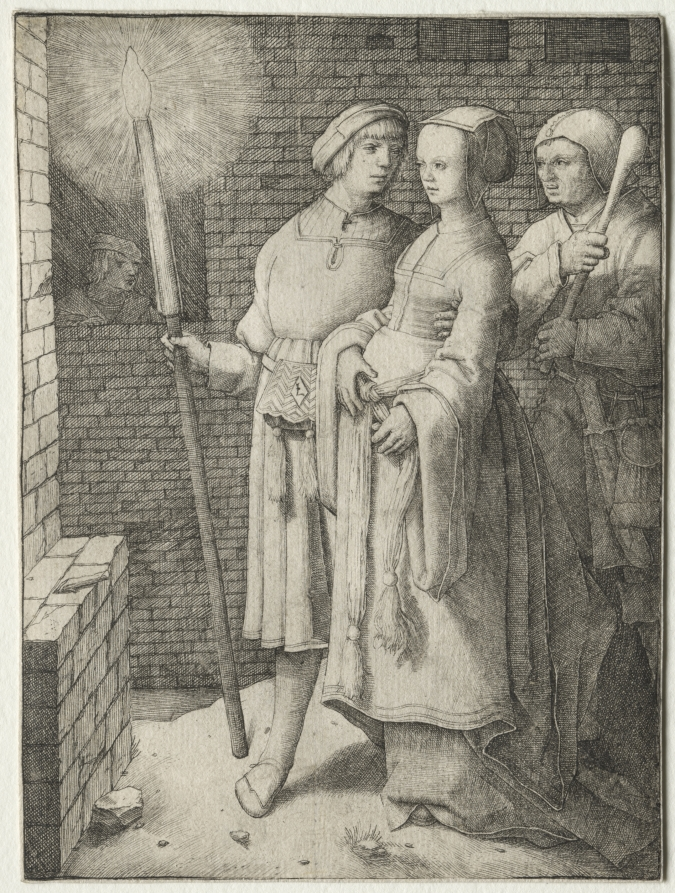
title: The Man with the Torch and a Woman Followed by a Fool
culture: Netherlands, 16th century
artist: Lucas van Leyden (Netherlandish, 1494–about 1533)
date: c. 1508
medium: engraving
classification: Print